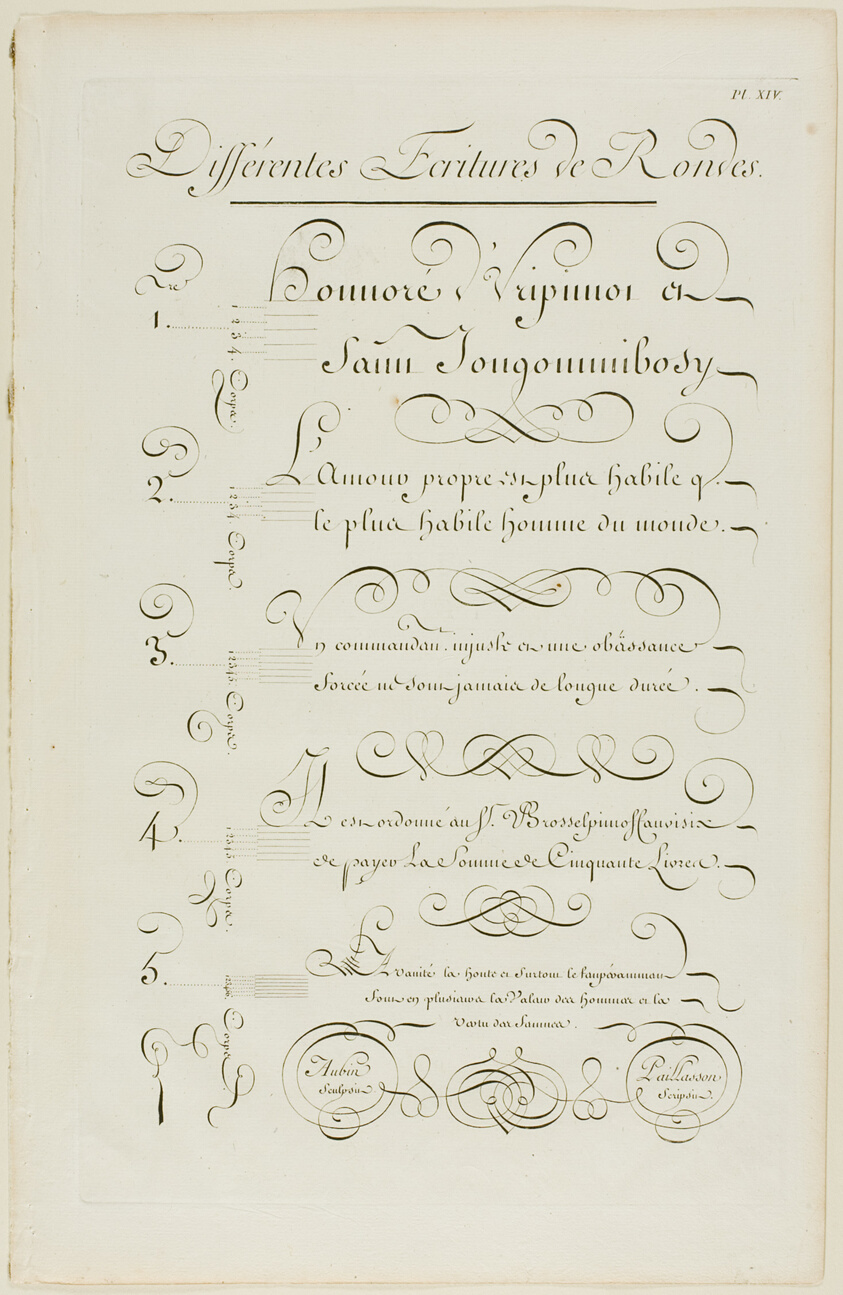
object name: Print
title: Various Rounded-Style Calligraphy, from Encyclopédie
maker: Aubin (French, active 18th century); after Charles Paillasson (French, 1718-1789); published by André le Breton (French, 1708-1779), Michel-Antoine David (French, c. 1707-1769), Laurent Durand (French, 1712-1763), and Antoine-Claude Briasson (French, 1700-1775)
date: 1760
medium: Engraving on cream laid paper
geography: France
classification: engraving; print; prints and drawing